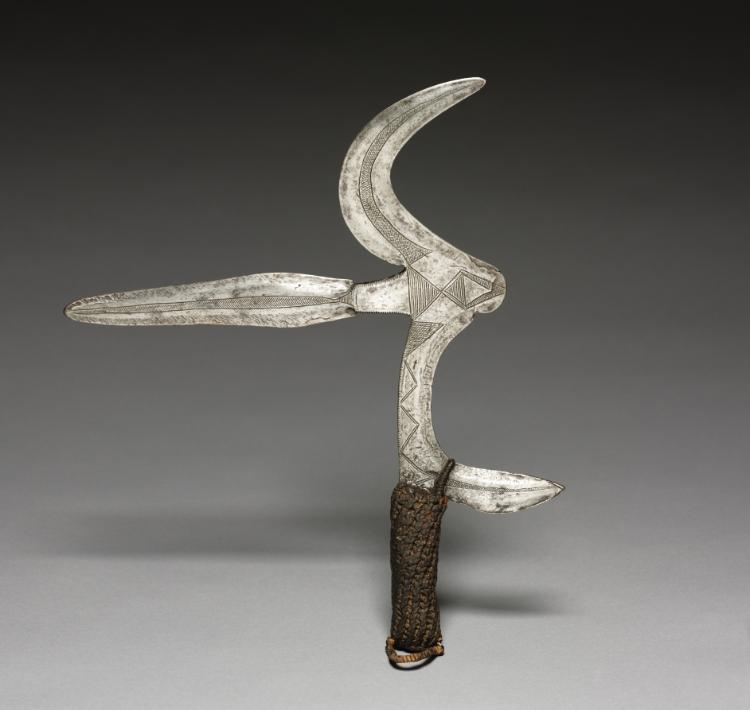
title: Throwing Knife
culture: Africa, Central Africa, Democratic Republic of Congo, unknown maker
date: before 1918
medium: iron and leather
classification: Arms and Armor